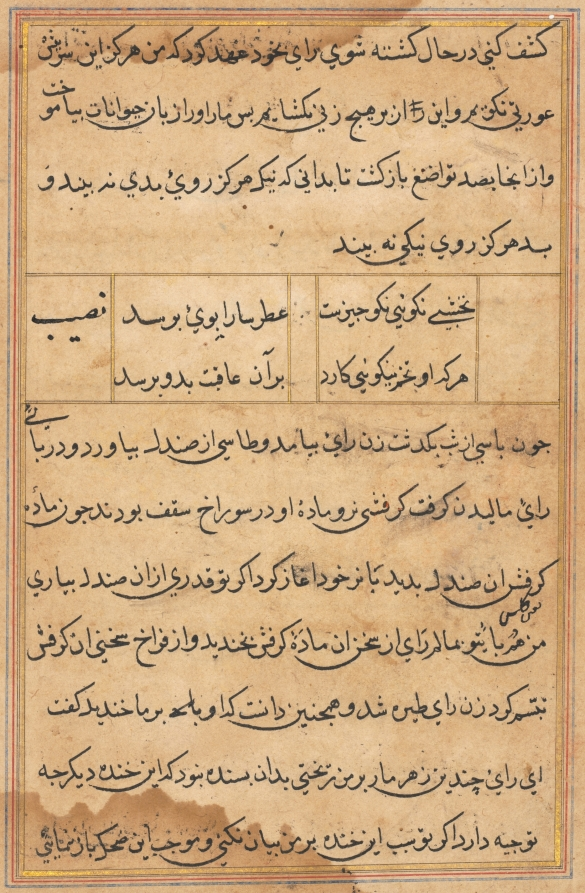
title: Page from Tales of a Parrot (Tuti-nama): text page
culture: Mughal India, court of Akbar (reigned 1556–1605)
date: c. 1560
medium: gum tempera, ink, and gold on paper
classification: Painting